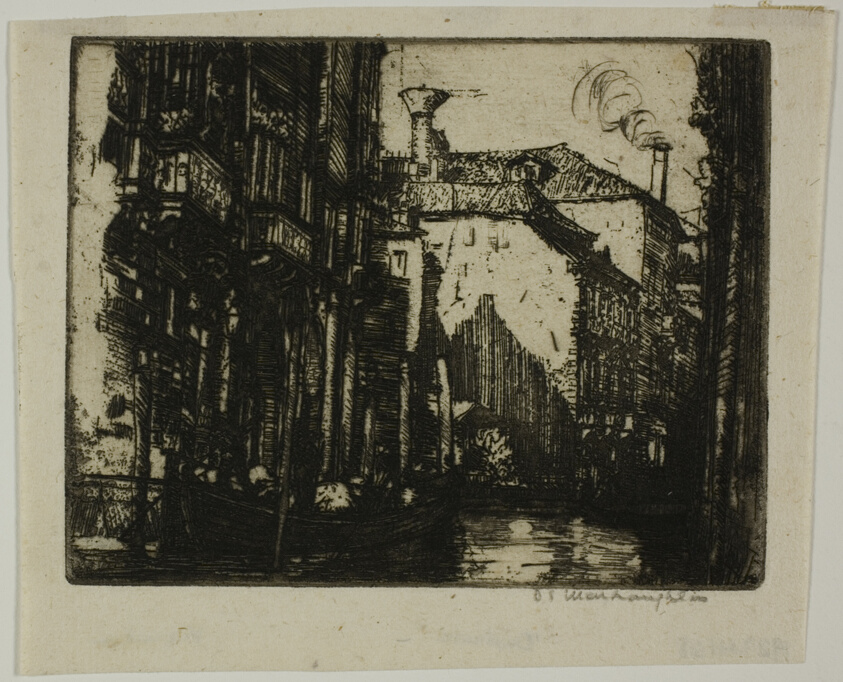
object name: Print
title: The Dark Canal, Venice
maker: Donald Shaw MacLaughlan (American, born Canada, 1876-1938)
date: 1908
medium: Etching in black on cream laid paper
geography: United States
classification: etching; print; prints and drawing